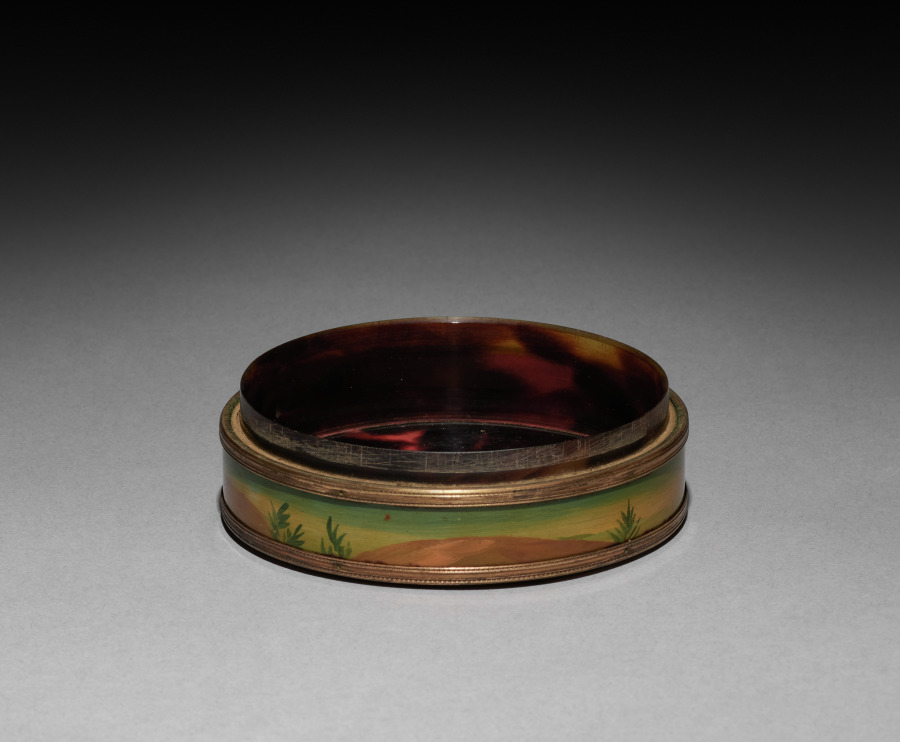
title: Box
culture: France, 18th century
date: 1700s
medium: lacquer with tortoiseshell lining, gilt metal mounts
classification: Miscellaneous